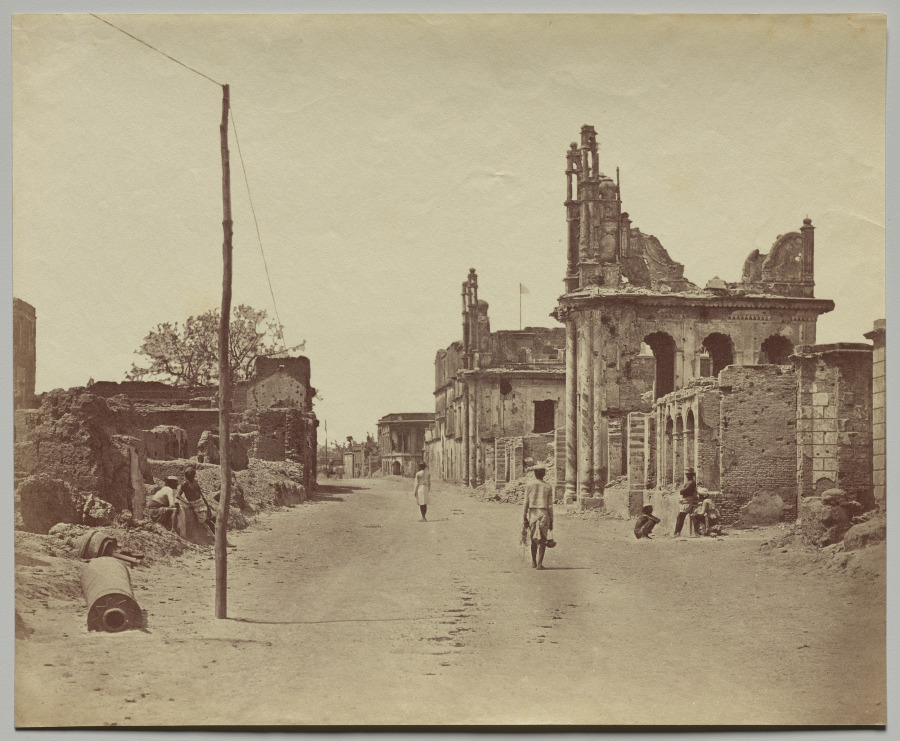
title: The Cawnpore Road in Lucknow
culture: England, 19th century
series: Lucknow After the Siege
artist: Felice A. Beato (British, 1832–1909)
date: 1858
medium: albumen print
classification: Photograph